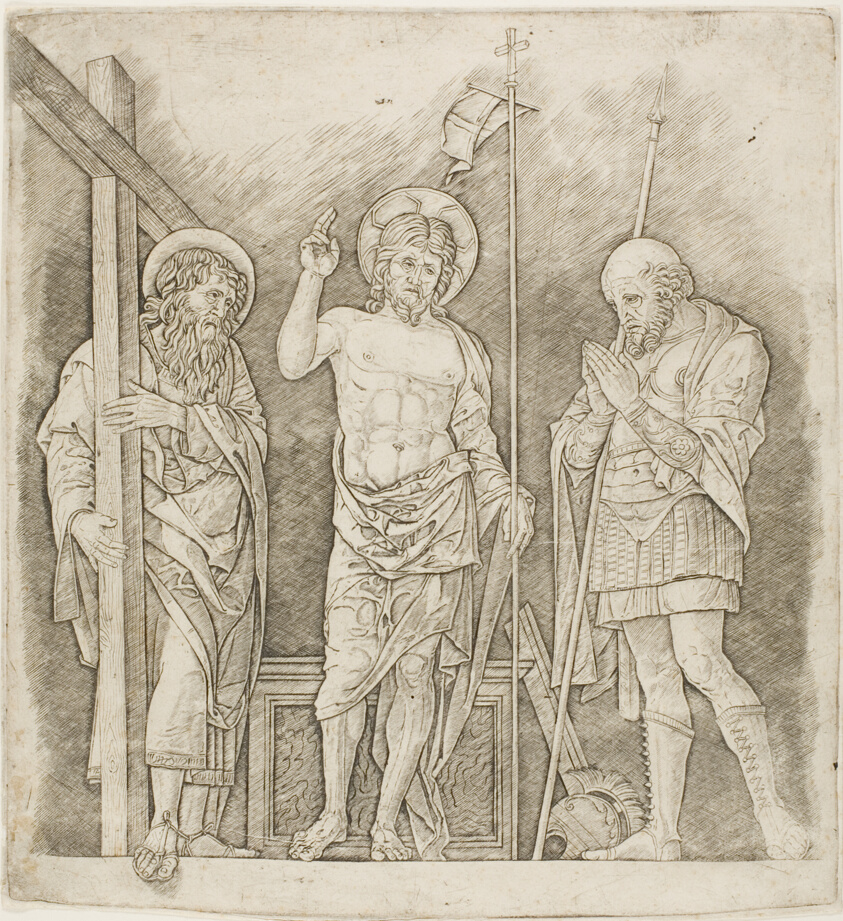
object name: Print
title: Risen Christ Between Saints Andrew and Longinus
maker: Workshop of Andrea Mantegna; Italian, 1431-1506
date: c. 1472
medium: Engraving on paper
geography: Italy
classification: engraving; print; prints and drawing